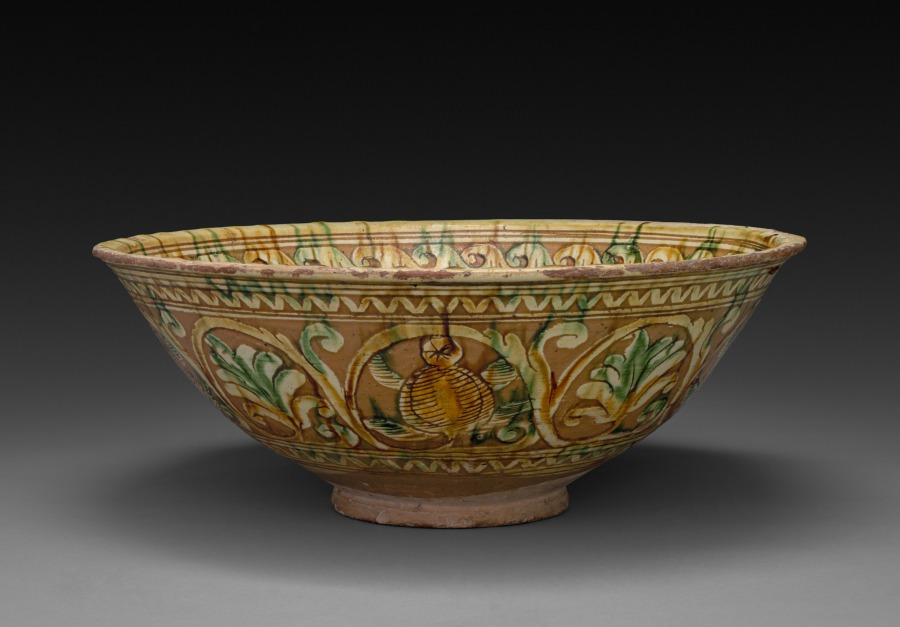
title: Bowl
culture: Italy, early 16th century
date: early 1500s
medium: reddish earthenware, incised slipware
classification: Ceramic